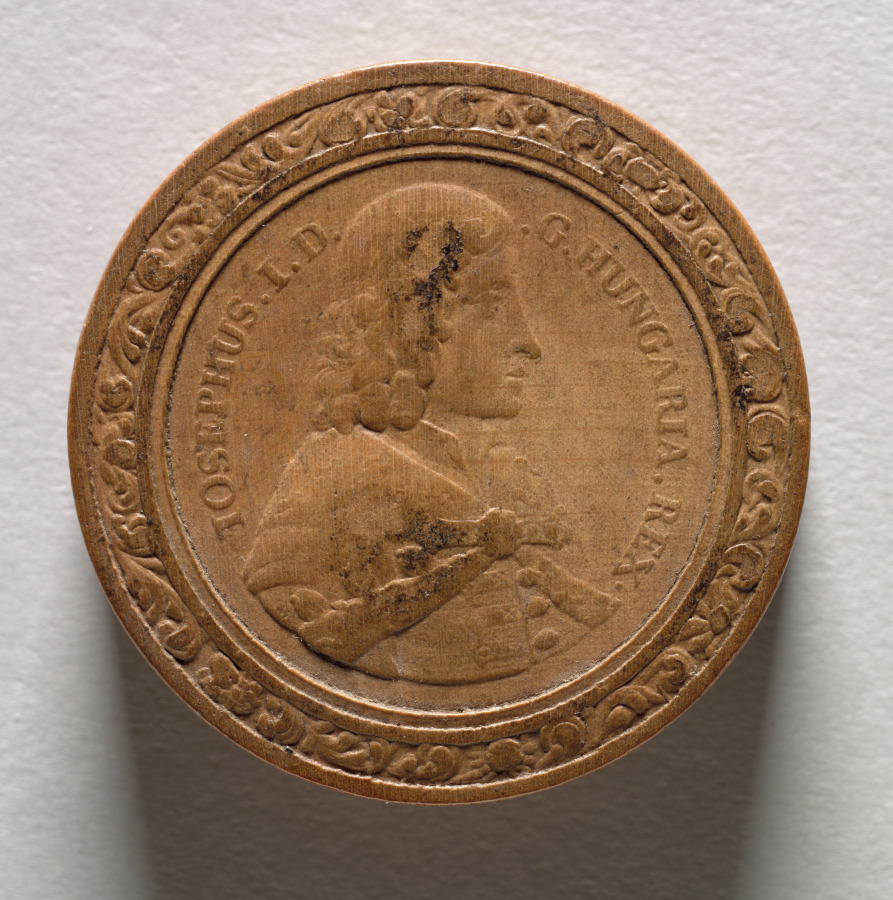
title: Gaming Piece (reverse)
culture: Germany, late 17th-early 18th Century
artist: Martin Brunner (German, 1659–1725)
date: c.1700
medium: wood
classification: Furniture and woodwork